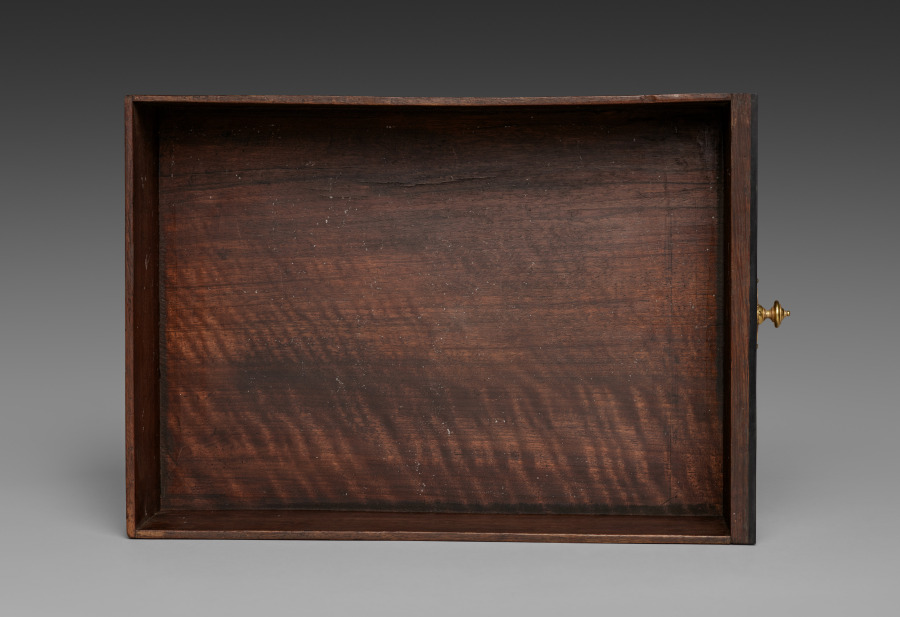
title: Interior Drawer for Cabinet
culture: France, late 17th Century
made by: André-Charles Boulle (French, 1642–1732)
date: c. 1690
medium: ebony, marquetry in metal and tortoise shell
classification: Furniture and woodwork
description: Appointed cabinetmaker to King Louis XIV in 1672, André-Charles Boulle became a master of furniture making in France during the late 1600s until his death in 1732. Known primarily for his use of marquetry, in which metal patterns are inlaid into tortoiseshell then applied within the veneered surface of the furniture, Boulle established a level of quality and craftsmanship few others could achieve. As a result, his work found favor at the royal court and among other aristocrats and diplomats eager to impress the king. The inclusion of a medallion depicting Louis XIV within the bronze decoration of this chest would have identified the owner with the royal court. Often exhibiting stout architectural proportions with elegant groups of inlaid motifs such as the parrot on the central panel of this chest, Boulle’s designs are an example of the intellectual fashion for contrasting ideas, materials, and motifs.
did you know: Originally designed to sit atop an elaborate tall stand, this chest was likely altered in the late 1700s to reduce its scale and height.